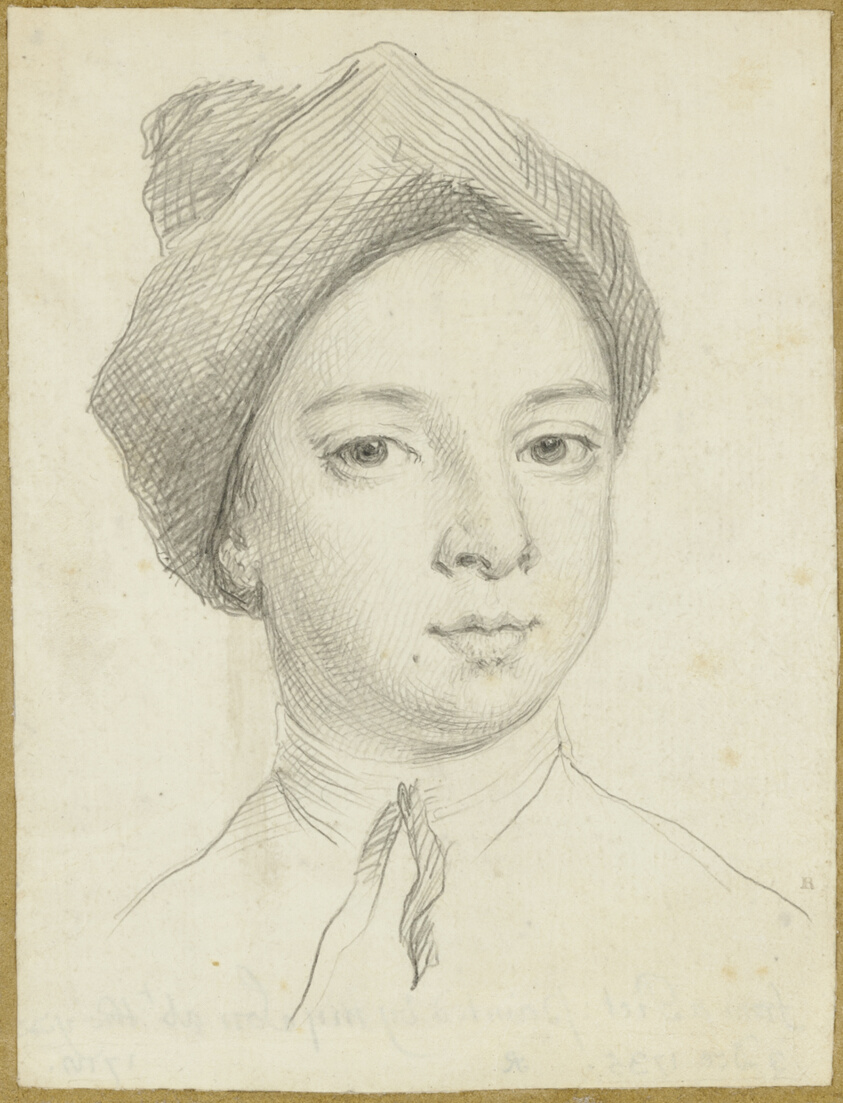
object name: Drawing and Watercolor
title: Portrait of Isaac Richardson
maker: Jonathan Richardson; British, 1667-1745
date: 1735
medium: Graphite on vellum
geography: United Kingdom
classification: graphite; drawings (visual works); prints and drawing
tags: portraits, prints and drawings